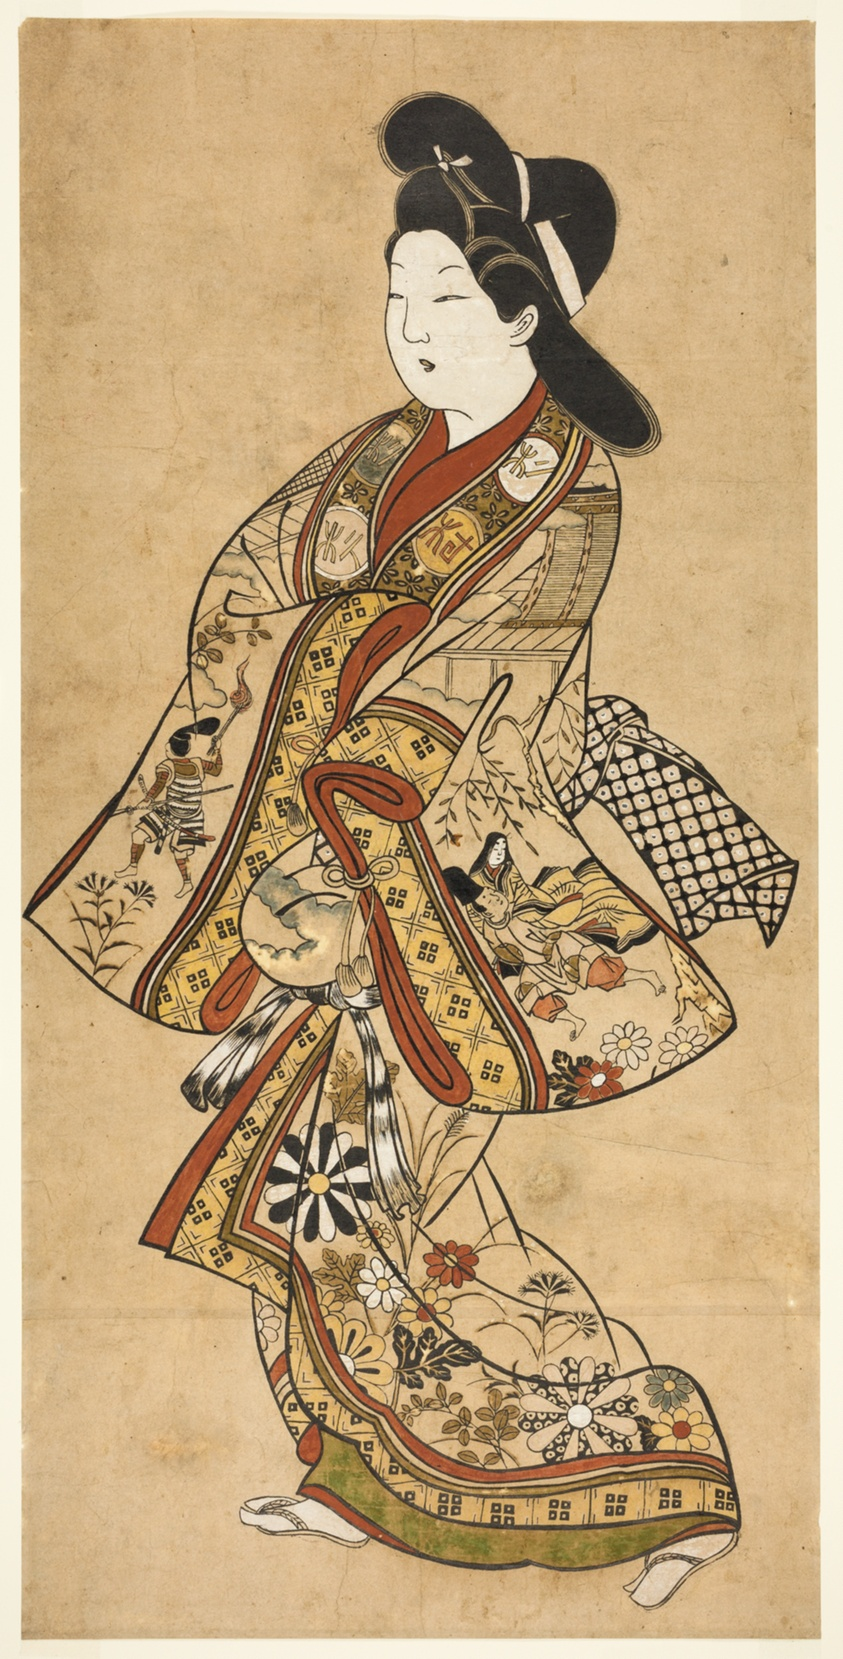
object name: Print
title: A Beauty Walking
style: Japanese (culture or style)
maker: Sugimura Jihei (Japanese, active c. 1681-98)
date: 17th century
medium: Hand-colored woodblock print; o-oban, sumizuri-e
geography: Japan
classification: woodblock print; print; asian art